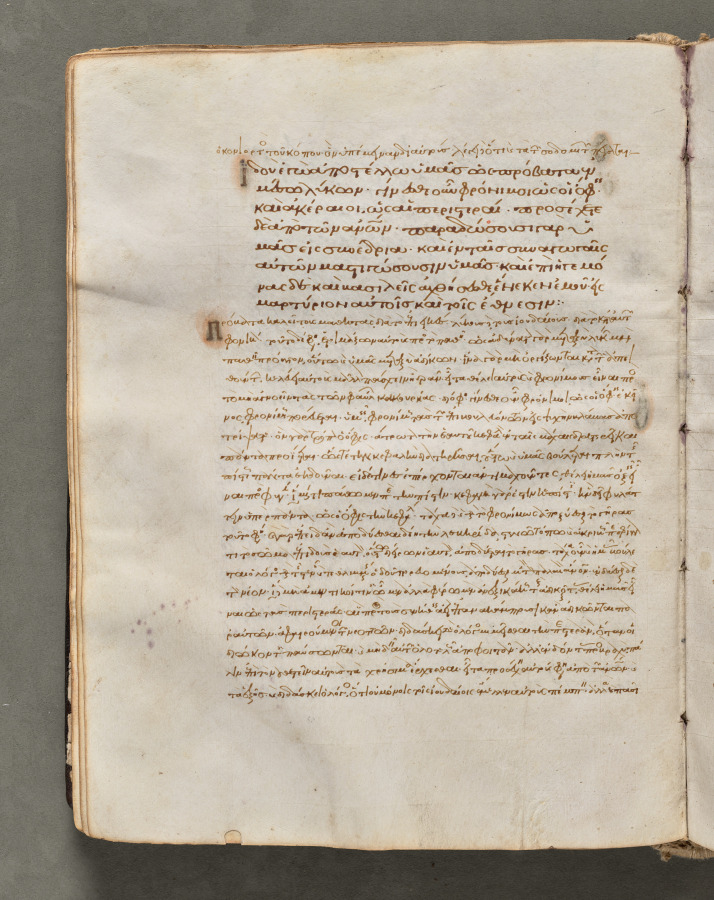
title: Text, folio 43 (verso), from a Gospel Book with Commentaries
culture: Byzantium, Constantinople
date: c. 1000–1100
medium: ink, tempera, and gold on vellum; leather binding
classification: Bound Volume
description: Each of the four gospels in this book opens on a page with brilliantly illuminated borders depicting the author of the text as well as birds-principally peacocks, symbols of the immortality of the soul-and fountains, representing the fountain of life and the salvation of the soul. This volume consists of 428 leaves with texts in Greek. Its level of sophistication suggests that it was probably written and decorated in a monastery in Constantinople.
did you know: Gospel Books were carried in procession through Byzantine churches.